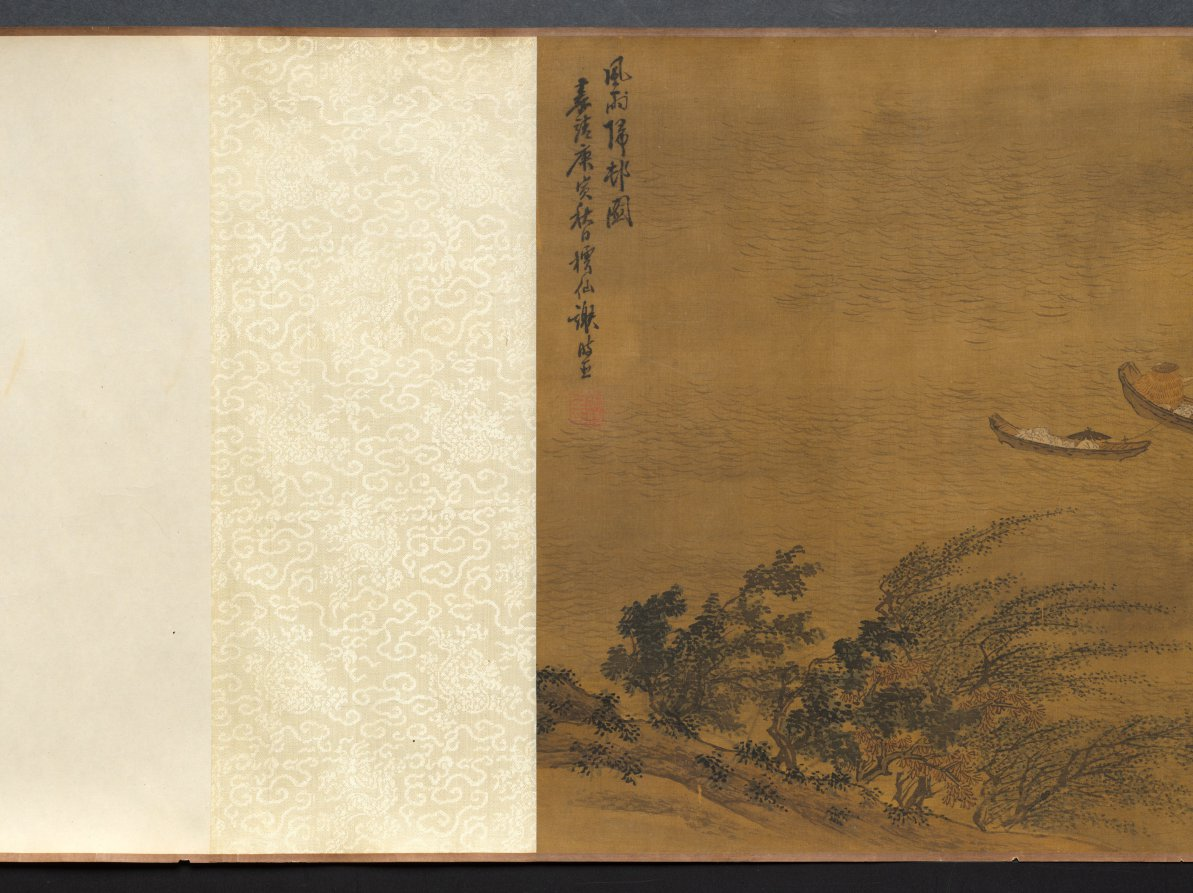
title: Returning to the Village in a Rainstorm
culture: China, Ming dynasty (1368–1644)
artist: Xie Shichen (Chinese, 1487–after 1567)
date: 1530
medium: Handscroll; ink and light color on silk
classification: Painting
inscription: 風雨歸村圖 嘉靖庚寅秋日樗仙謝時臣. [印] 謝時臣印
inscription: 3 additional seals unidentified.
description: This scroll depicts a wind- and rainswept landscape with figures in the countryside struggling against a late summer monsoon rainstorm. Such weather was familiar to residents of the lower Yangzi delta. Xie Shichen spent most of his life in the Suzhou area. Details of his career are scant, but his surviving works suggest that he made his living as a professional painter. This painting conveys drama and anecdotal observations, characteristic of Zhe school paintings, such as the one by Lü Wenying, CMA 1970.76.